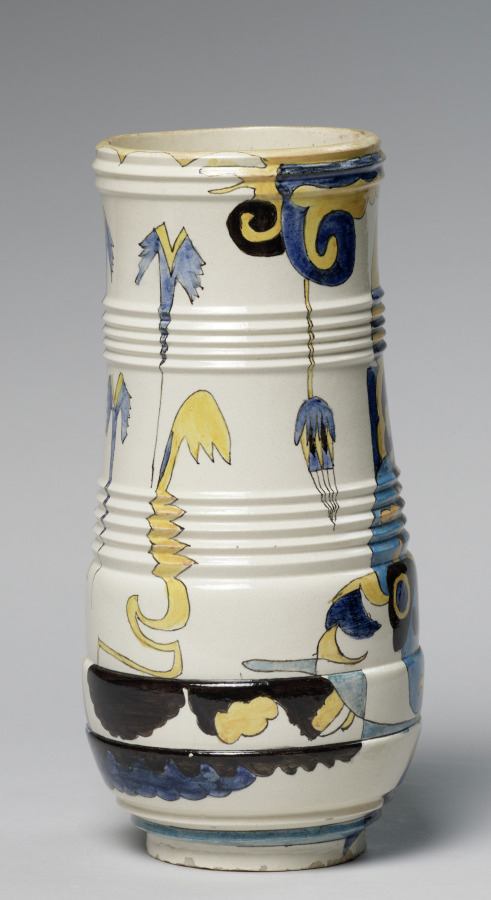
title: Jar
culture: Netherlands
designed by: Theodorus A. C. Colenbrander (Dutch, 1841–1930)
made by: Rozenburg Factory (Netherlandish)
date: 1885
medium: earthenware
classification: Ceramic